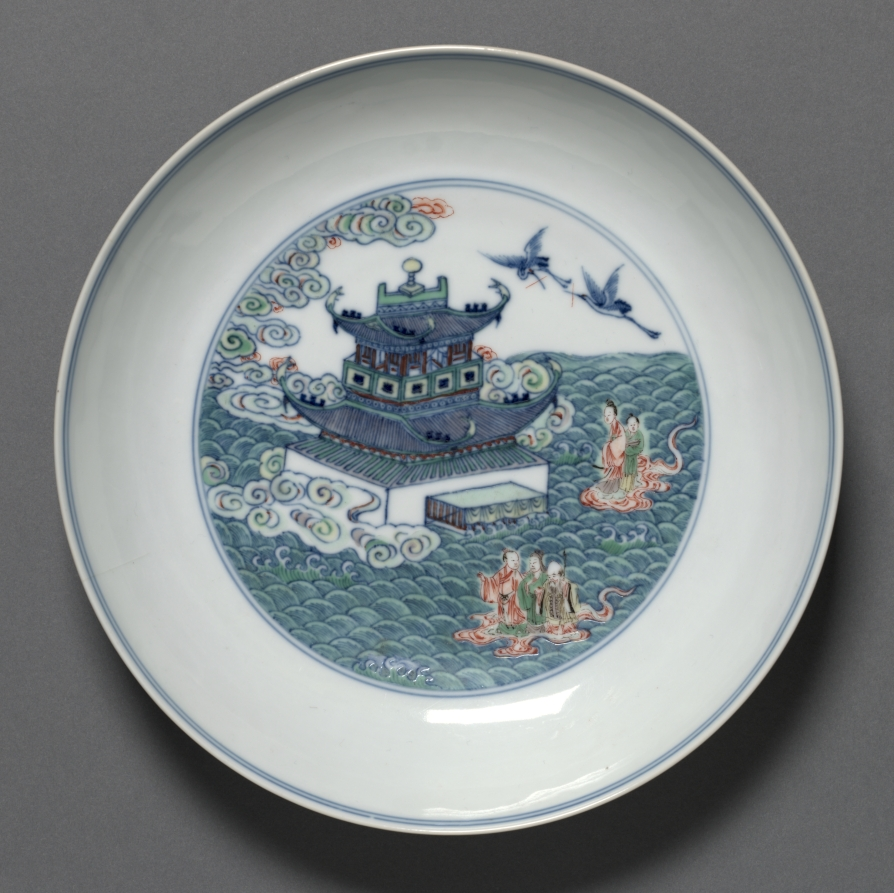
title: Plate with Isle of the Immortals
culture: China, Jiangxi province, Jingdezhen kilns, Qing dynasty (1644-1911), Yongzheng mark and reign (1723-35)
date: 1723–35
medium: porcelain decorated in underglaze cobalt blue and overglaze enamels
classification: Ceramic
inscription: 大清雍正年製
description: This multicolored dish is decorated with the sacred isle, also seen on the exterior of the blue-and-white dish nearby. A pavilion emerges amid rising and falling waves, a symbol of constant transformation and change. Above the waves are mysterious clouds, symbolizing the cosmic vital energy (qi) that animates all things and beings on earth in Daoism. The interior of the dish also shows cranes carrying sticks in their beaks, a motif that symbolizes longevity. Cranes carrying sticks above a pavilion in the sea express the wish “May you live to a ripe old age (haiwu tianchou; 海屋添籌).”